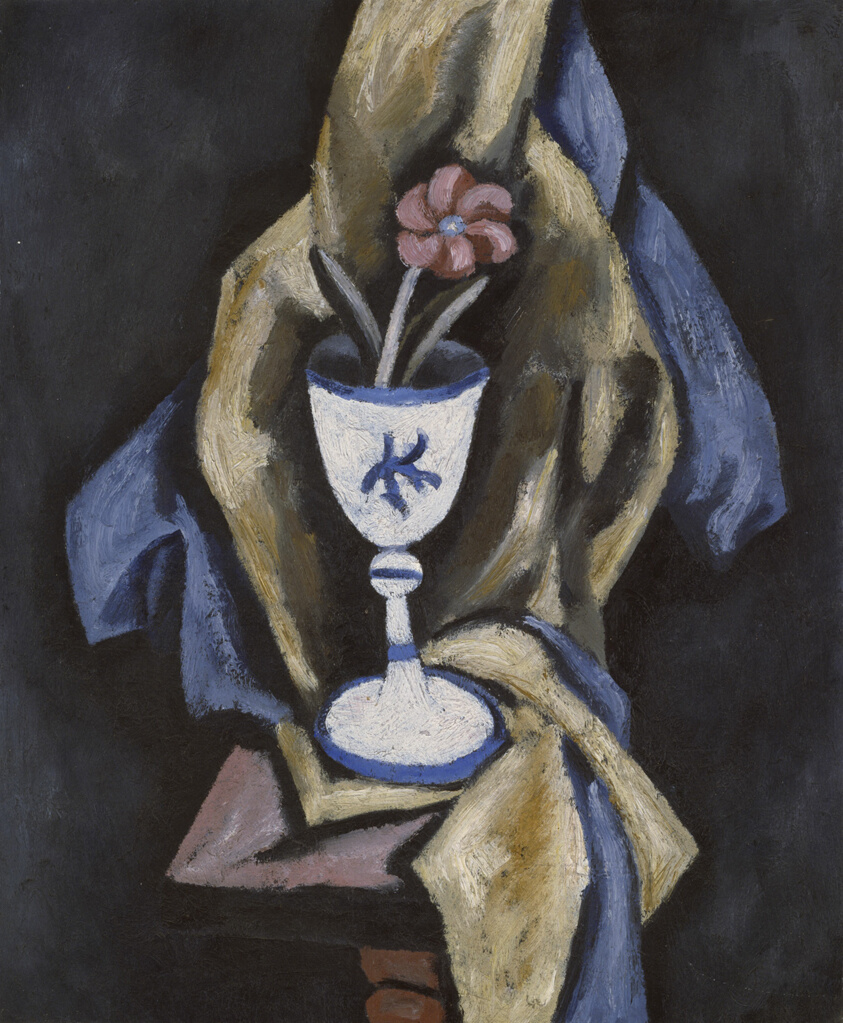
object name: Painting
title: Still Life No. 15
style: Modernism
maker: Marsden Hartley (American, 1877–1943)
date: c. 1917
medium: Oil on composition board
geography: United States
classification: oil on panel; painting; modern and contemporary art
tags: still life